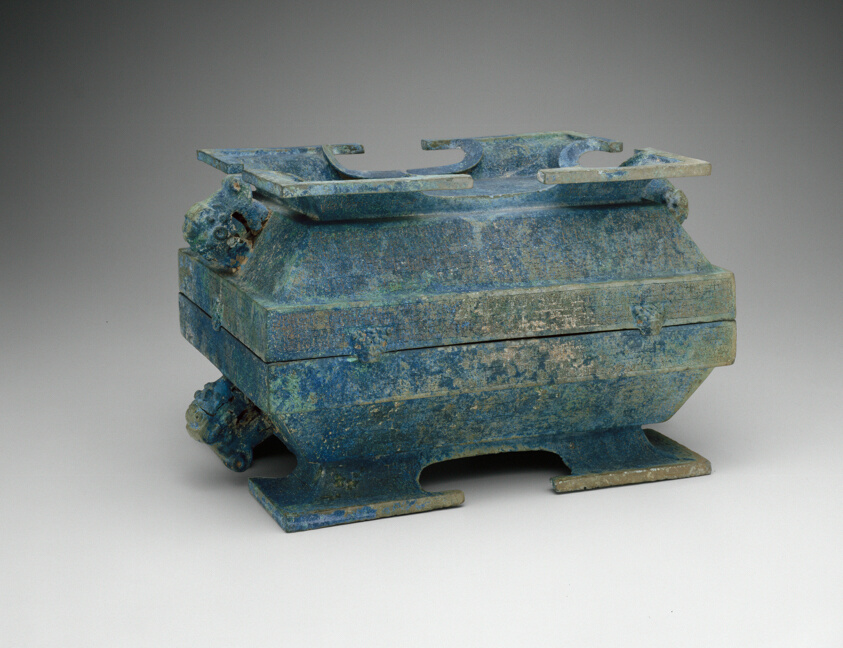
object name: Vessel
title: Rectangular Tureen (fu)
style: Chinese (culture or style)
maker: China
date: Eastern Zhou dynasty, Spring and Autumn period (770–481 B.C.)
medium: Bronze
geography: China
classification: vessel; bronze; metal; asian art